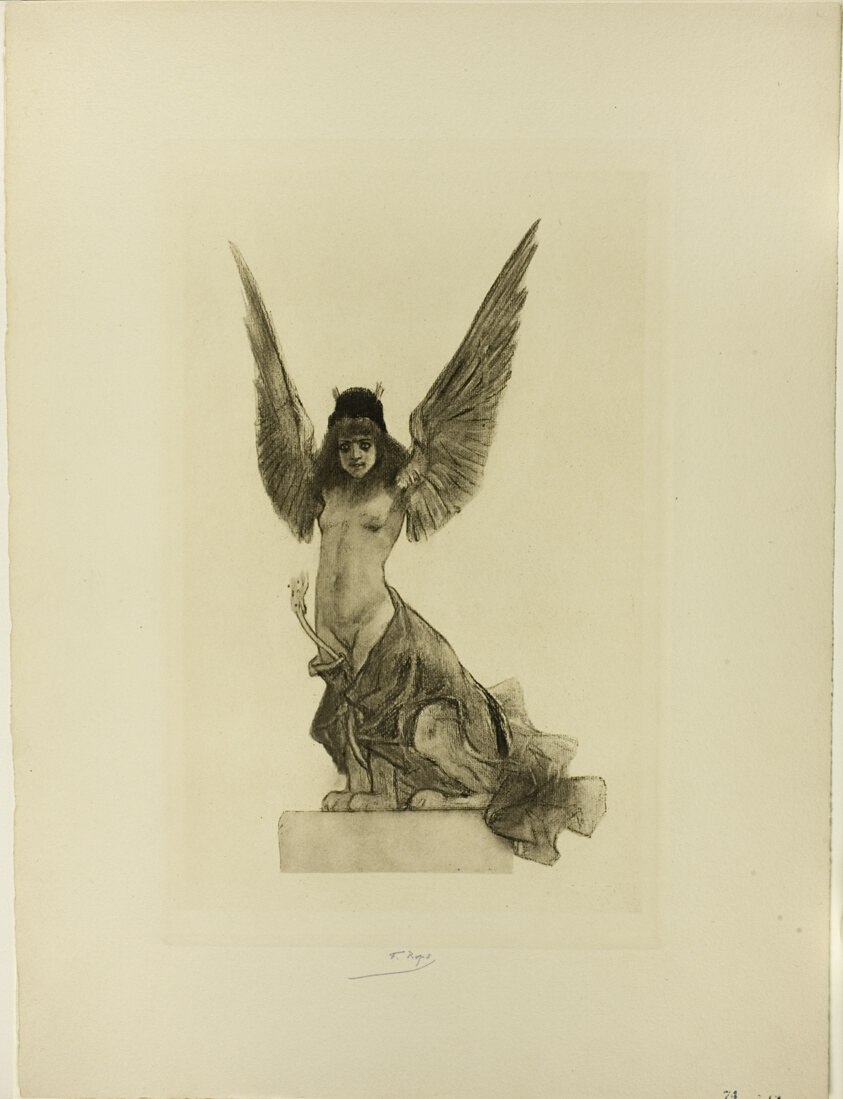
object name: Print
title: Parallelism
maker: Félicien Rops (Belgian, 1833-1898)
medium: Heliogravure on cream wove paper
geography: Belgium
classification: photogravure; print; prints and drawing